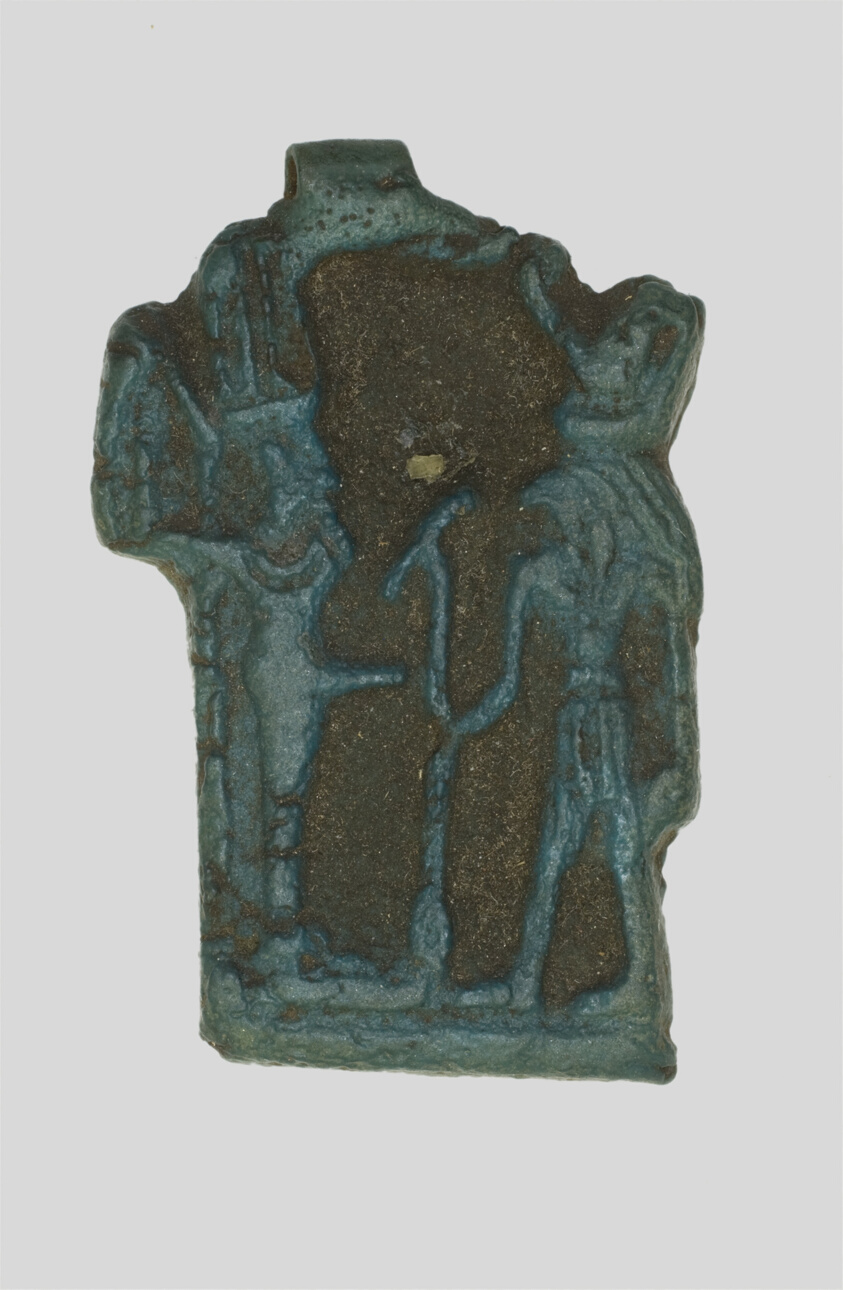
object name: Costume and Accessories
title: Amulet of the Gods Amun-Ra Kamutef and Horus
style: egyptian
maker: Egyptian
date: Late Period–Ptolemaic Period (7th–1st century BCE)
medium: Faience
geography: Egypt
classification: amulet; jewelry; ceramics; ancient art; costume; faïence (composite material)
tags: gods (deities)